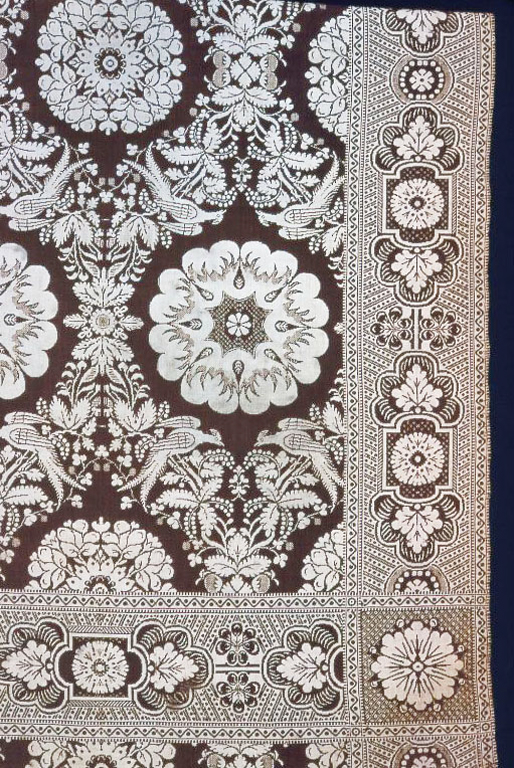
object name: Textile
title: Coverlet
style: 19th century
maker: United States, New York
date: 1840s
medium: Cotton and wool, plain weave double cloth; woven on loom with Jacquard attachment; two loom widths joined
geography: New York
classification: weaving - coverlet; coverlet; weaving; textile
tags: medallions, parrots, bird, birds, foliage, coverlet